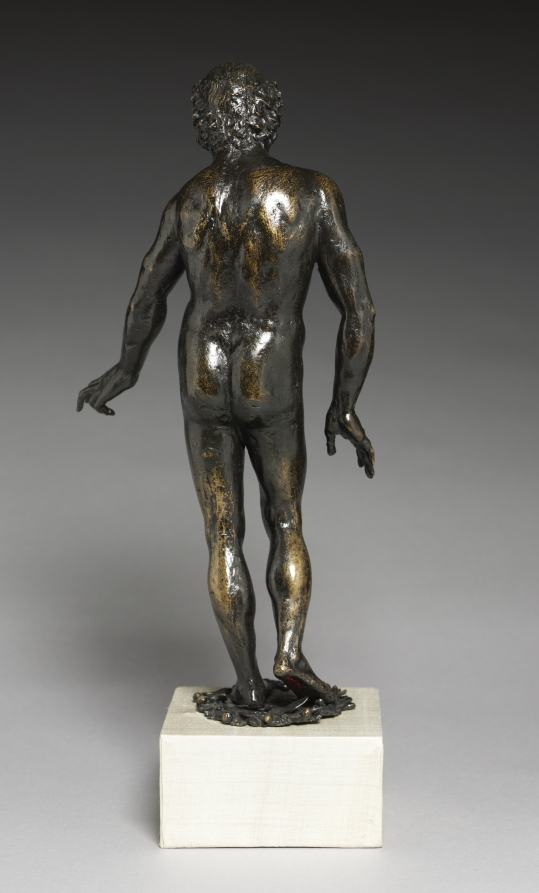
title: Standing Figure of a Man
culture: Italy, Siena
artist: circle of Francesco di Giorgio Martini (Italian, 1439–1501)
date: c. 1500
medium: bronze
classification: Sculpture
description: Derived from classical antiquity, this nude male stands in the contrapposto pose, bearing his weight on his left leg, with his right leg bent, as if in motion. He steps lightly, so that only the toes of his right leg touch the ground. He stands on a laurel wreath, a plant which in antiquity would be waved as a symbol of joy after a military victory. During the Renaissance, small bronzes were kept in cabinets, bringing the gods and goddesses of ancient times into the home. Flaws in the bronze casting suggest that this piece is from the early Renaissance. In 1971, Ulrich Middeldorf rejected Olga Raggio's original attribution to an anonymous Florentine, attributing it instead to the sixteenth-century Sienese artist Francesco di Giorgio Martini (1439-1501), based partly on its resemblance to Francesco's bronze angels in Siena's Duomo. However, such details as the awkward posture and frozen motion of the body relate this work more closely to Francesco's pupil Giacomo Cozzarelli (1453-1515). Standing Figure of a Man is attributed to the circle of Francesco di Giorgio Martini, as uncertainties remain regarding its exact author.